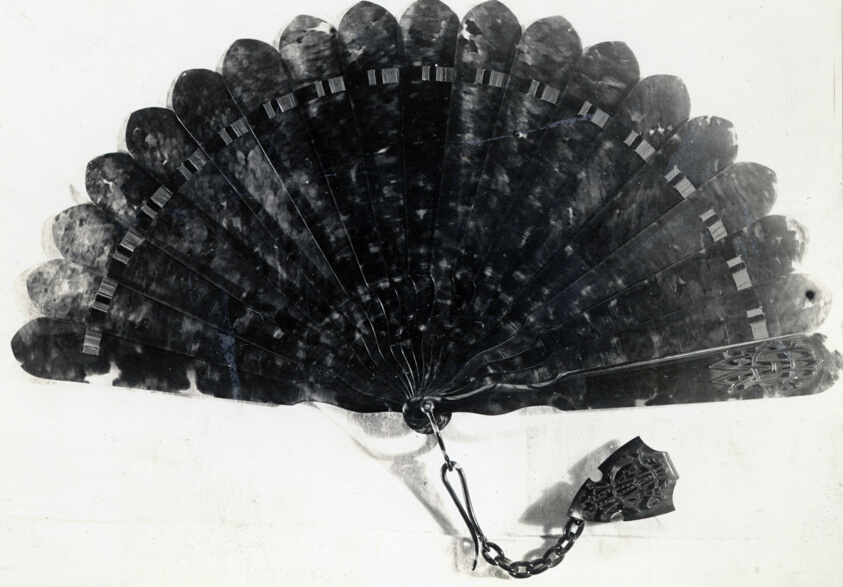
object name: Costume and Accessories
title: Fan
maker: Italy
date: c. 1873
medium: Tortoise shell; shell hook and chain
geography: Italy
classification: textile; fan - misc; costume accessory - folding fan; costume